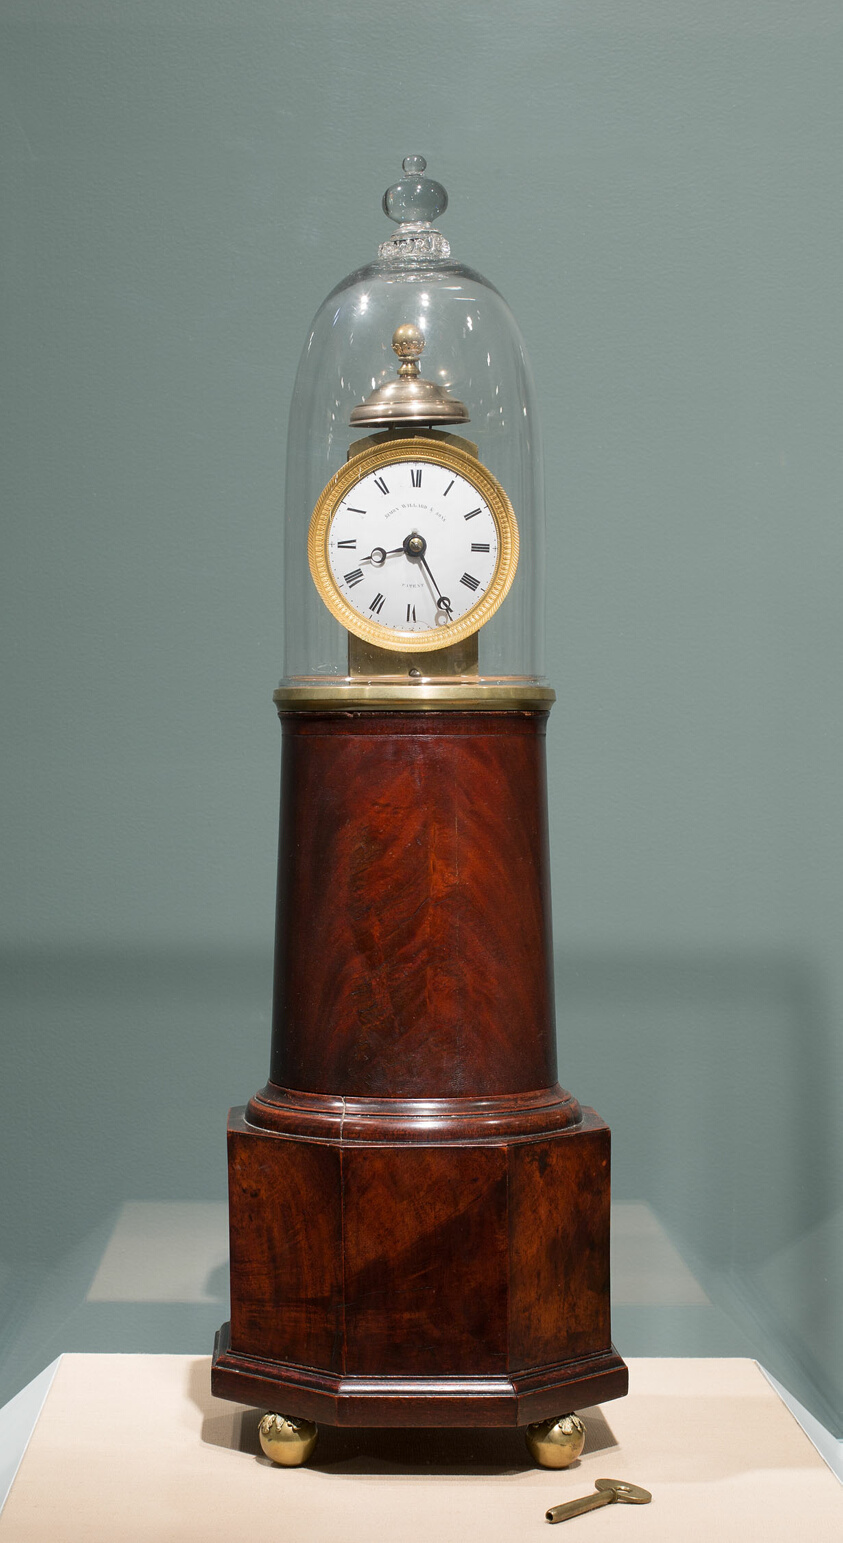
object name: Furnishings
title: Lighthouse Clock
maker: Simon Willard and Sons; American, 1753–1848; Roxbury, Massachusetts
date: 1825–30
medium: White pine, mahogany veneer, enamel, brass, and gilt and silver mounts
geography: Roxbury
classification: furniture accessory; american decorative arts; american arts; decorative arts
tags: architecture